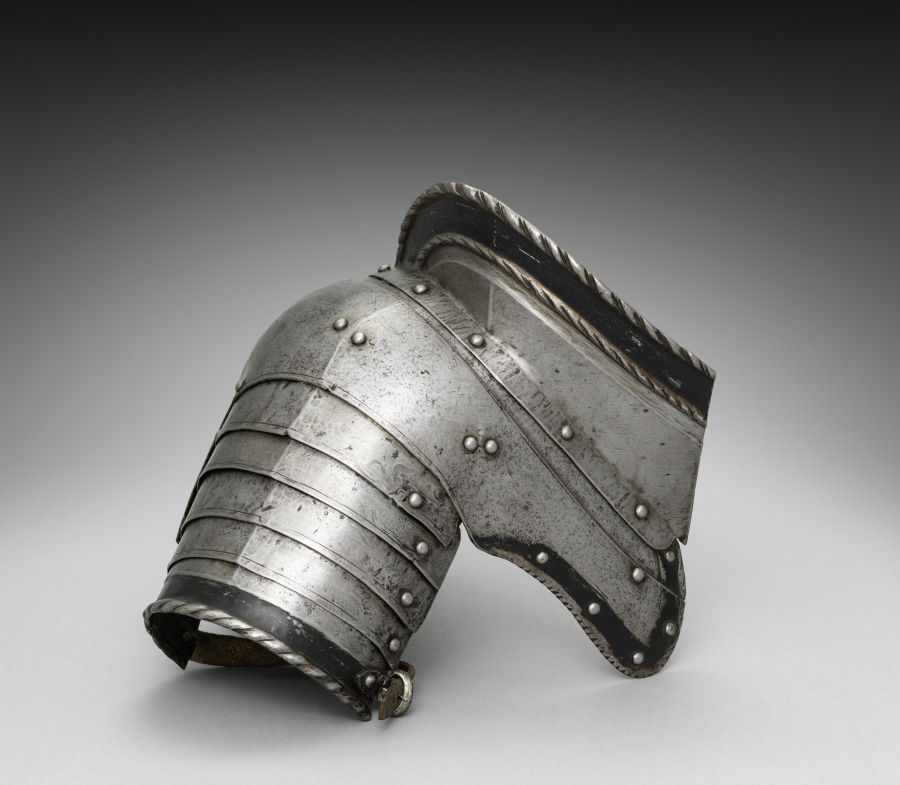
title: Right Pauldron with Guard Brace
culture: Germany, 19th century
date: 1801–1900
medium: steel with black paint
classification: Arms and Armor